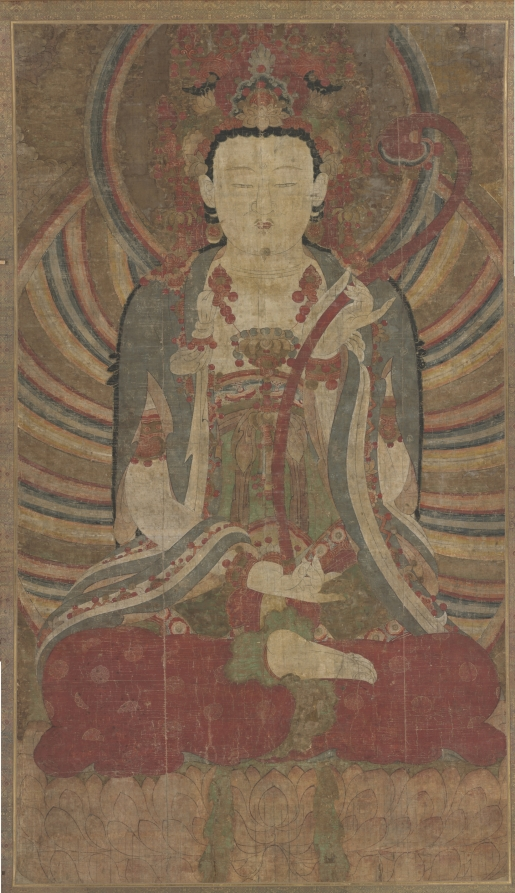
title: Seated Manjusri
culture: Korea, Joseon dynasty (1392–1910)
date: 1700s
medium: hanging scroll; ink and color on silk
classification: Painting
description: Large-size Buddhist paintings dated to the Joseon period (1392–1910) were once hung behind Buddhist statues, attached to the wall. In the Buddhist pantheon of the Joseon period, Bodhisattva Manjusri appears as a deity attendant to Vairocana Buddha.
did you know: Bodhisattva Manjusri is holding a ruyi scepter to represent ultimate wisdom.